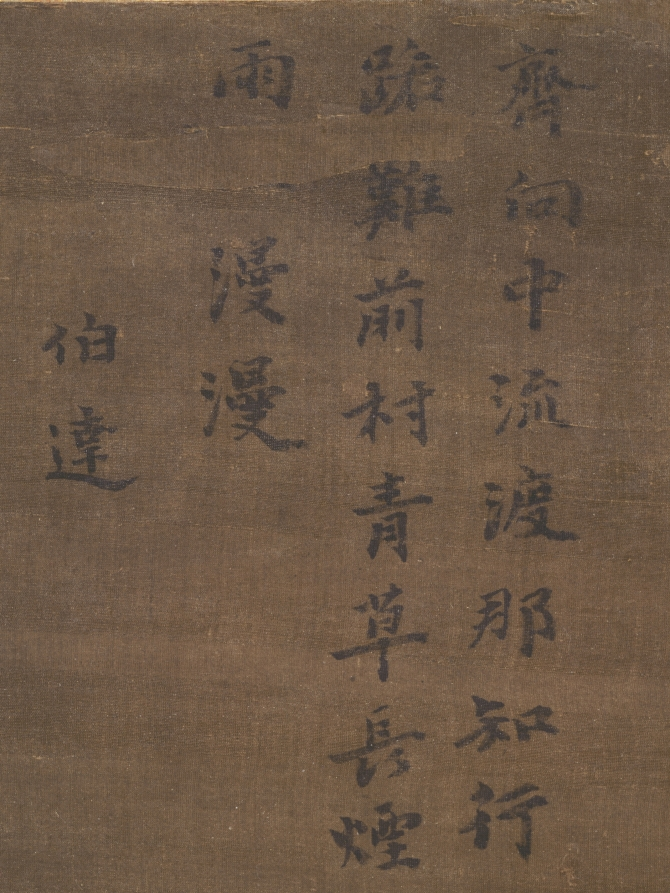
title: Herdboys and Buffalo in Landscape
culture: China, Qixian, Yuan dynasty (1271-1368)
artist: Guo Min (Chinese, mid-late 1200s)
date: 1200s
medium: Hanging scroll; ink on silk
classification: Painting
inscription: 齊向中流渡，那知行路難。/ 前村青草長，煙雨□漫漫。/ 伯達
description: Herdboys tend their buffalo in a bucolic landscape by a winding stream. Guo Min emphasizes the massive forms and mighty power of the animals, transforming them into forces of nature. The poem on this scroll reads: "Together, they wade through the middle of the stream, Mindless of perils in the journey. The grass grows tall in the village ahead, While the mist and rain spread far and wide."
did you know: Tending water buffalos has traditionally been the task of young boys and can still be seen in rural areas of Southern China today.